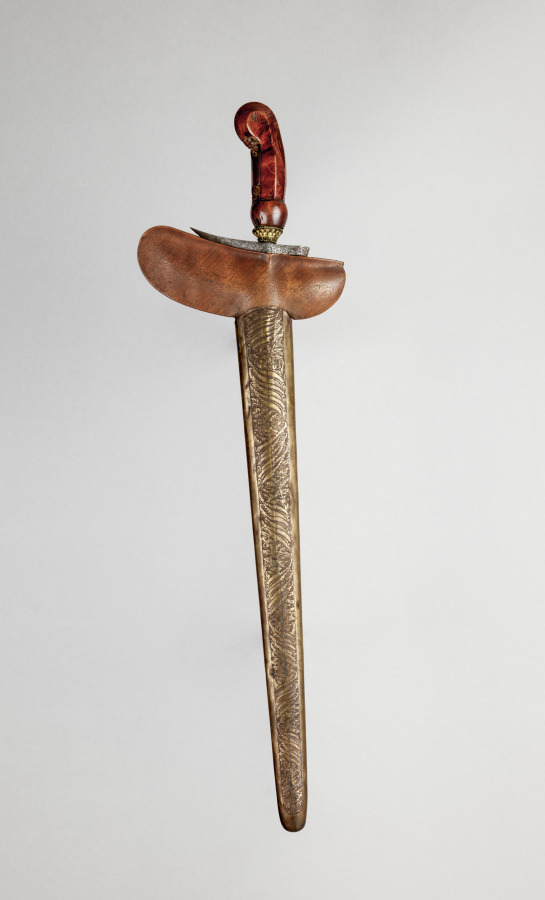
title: Sword (Kris)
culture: Java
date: 1800s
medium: iron with carved wooden handle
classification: Arms and Armor